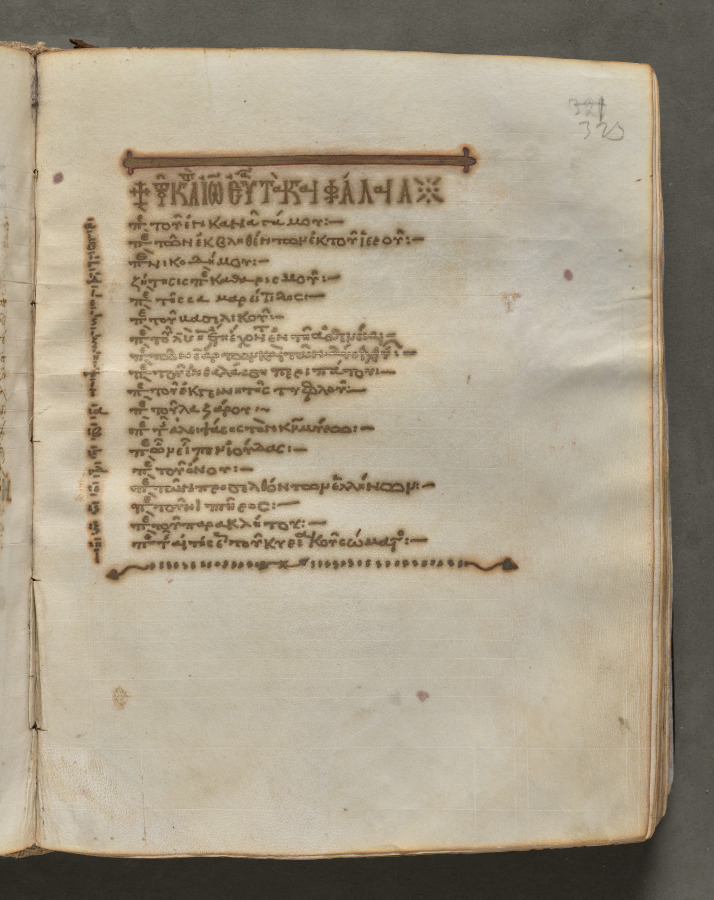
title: Text, folio 323 (recto), from a Gospel Book with Commentaries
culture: Byzantium, Constantinople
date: c. 1000–1100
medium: ink, tempera, and gold on vellum; leather binding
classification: Bound Volume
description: Each of the four gospels in this book opens on a page with brilliantly illuminated borders depicting the author of the text as well as birds—principally peacocks, symbols of the immortality of the soul—and fountains, representing the fountain of life and the salvation of the soul. This volume consists of 428 leaves with texts in Greek. Its level of sophistication suggests that it was probably written and decorated in a monastery in Constantinople.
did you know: Gospel books were carried in procession through Byzantine churches.